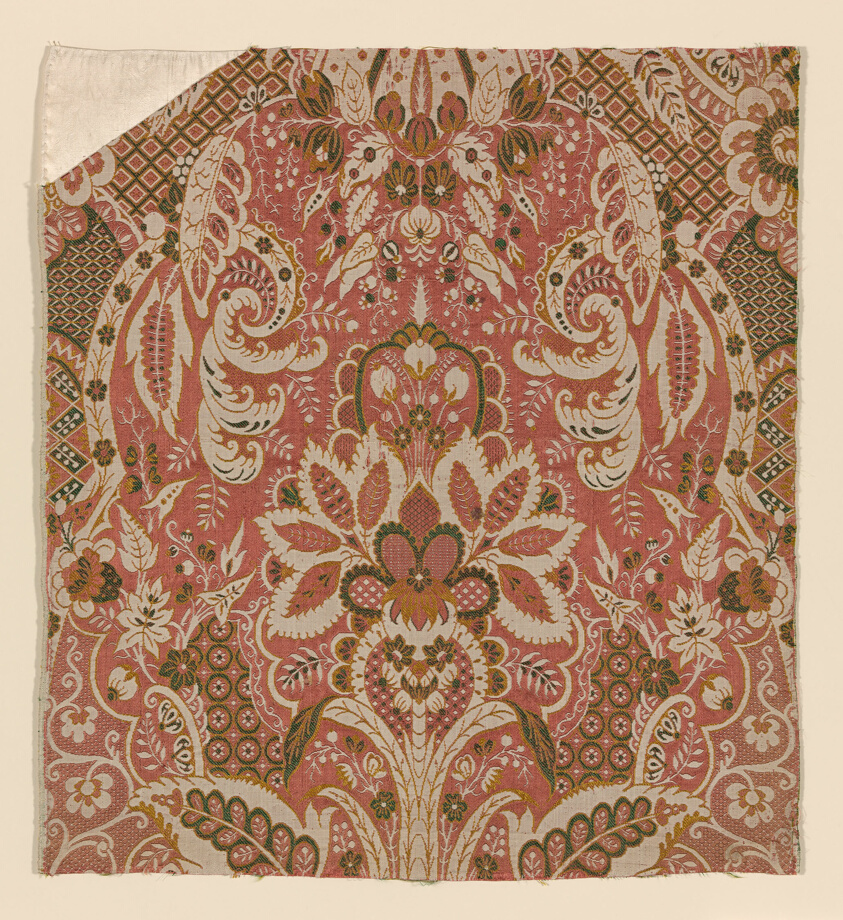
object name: Textile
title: Fragment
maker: France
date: 1722/27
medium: Silk, warp-float faced 7:1 satin weave with supplemenatry patterning wefts bound in 3:1 twill interlacings and self-patterning ground wefts tied by supplementary binding warps in plain interlacing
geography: France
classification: textile; weaving